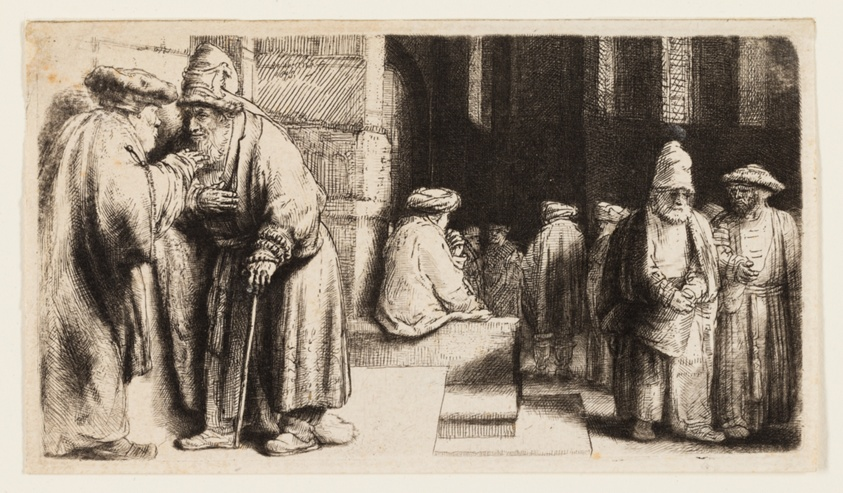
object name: Print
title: Jews in the Synagogue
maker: Rembrandt van Rijn (Dutch, 1606-1669)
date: 1648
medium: Etching and drypoint on ivory laid paper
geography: Holland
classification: etching; print; prints and drawing; paper; drypoint